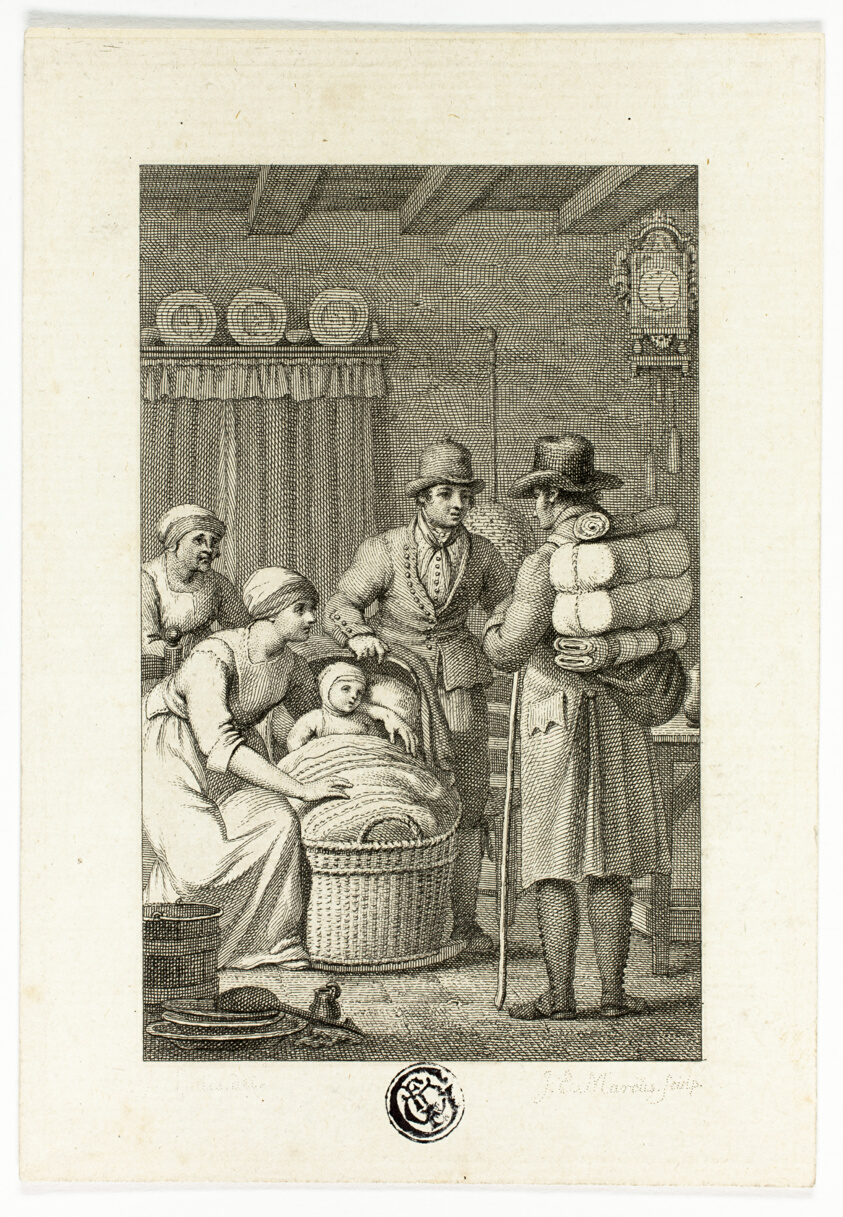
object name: Print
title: Pathfinder Illustration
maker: Jacob Smies; Dutch, 1764-1833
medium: Engraving on paper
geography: Holland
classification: engraving; print; prints and drawing